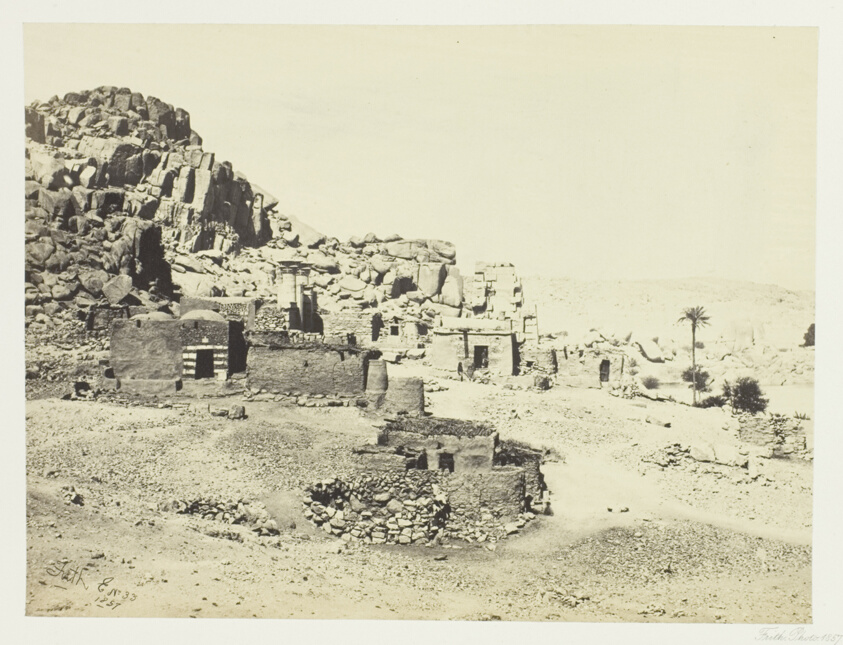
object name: Photograph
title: Antiquities at Biggeh, Opposite Philæ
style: 19th century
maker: Francis Frith (English, 1822–1898); published by James S. Virtue (English, 1829–1892)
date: 1857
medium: Albumen print, pl. 32 from the album "Egypt and Palestine, Volume I" (1858)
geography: England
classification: photograph; albumen silver print; photography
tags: Collected by Hugh Edwards, Egypt and Palestine